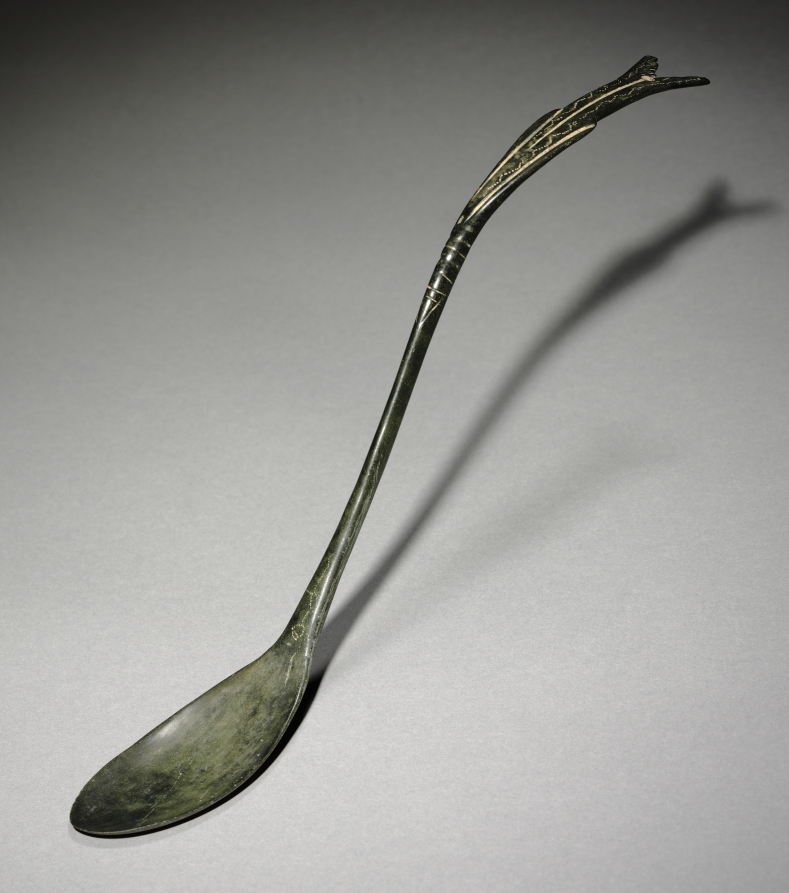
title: Spoon with Fish-Tail Design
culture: Korea, Goryeo dynasty (918–1392)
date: 918–1392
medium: bronze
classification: Metalwork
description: Many of Goryeo period spoons like this one feature a curved handle that splits into a jagged fishtail design. This fishtail design is not unique to Korea; it was also widely used in the area under the rule of two non-Han Chinese states: Liao (907–1125) and Jin (1115–1234). These seemingly ordinary objects testify to exciting material interactions between the Goryeo dynasty and non-Han Chinese northern states, which were often omitted from the official records.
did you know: Bronze spoons are the most common burial item. Scholars have proposed that toward the end of the 1300s, Koreans enjoyed meat-based soups more than any other dishes, explaining why spoons became common household items as well as burial goods.